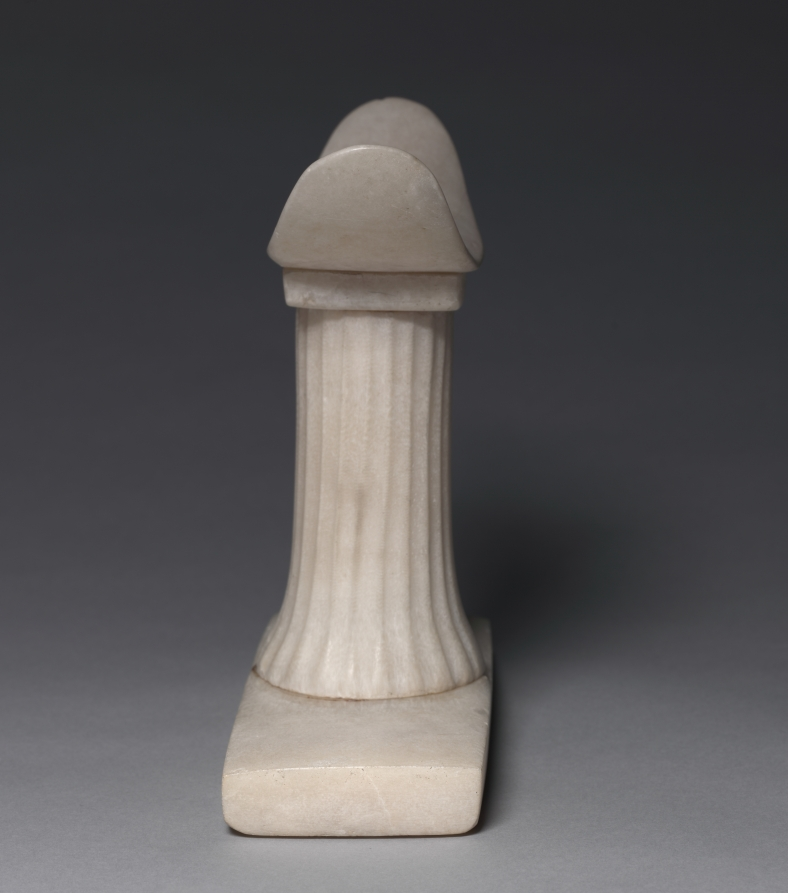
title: Headrest of Irut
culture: Egypt, Old Kingdom (2647–2124 BCE), Dynasties 5–6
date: c. 2454–2140 BCE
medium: travertine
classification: Funerary Equipment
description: The ancient Egyptians used wooden headrests as pillows. Stone headrests were replicas made for the tomb. This example is inscribed on the top of the supporting column for "the king’s noblewoman, Irut."